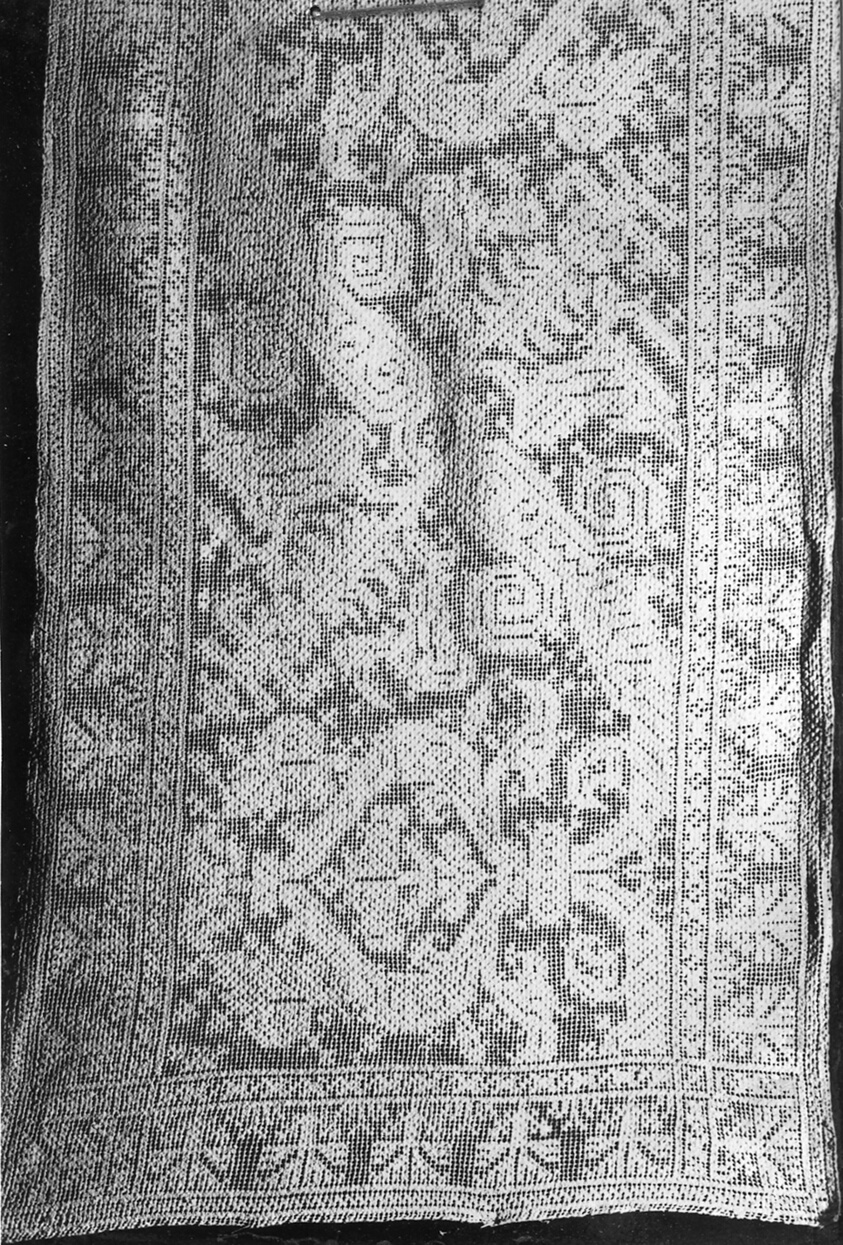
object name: Textile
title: Border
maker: Italy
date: 18th century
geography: Italy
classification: textile; needlework (visual works)